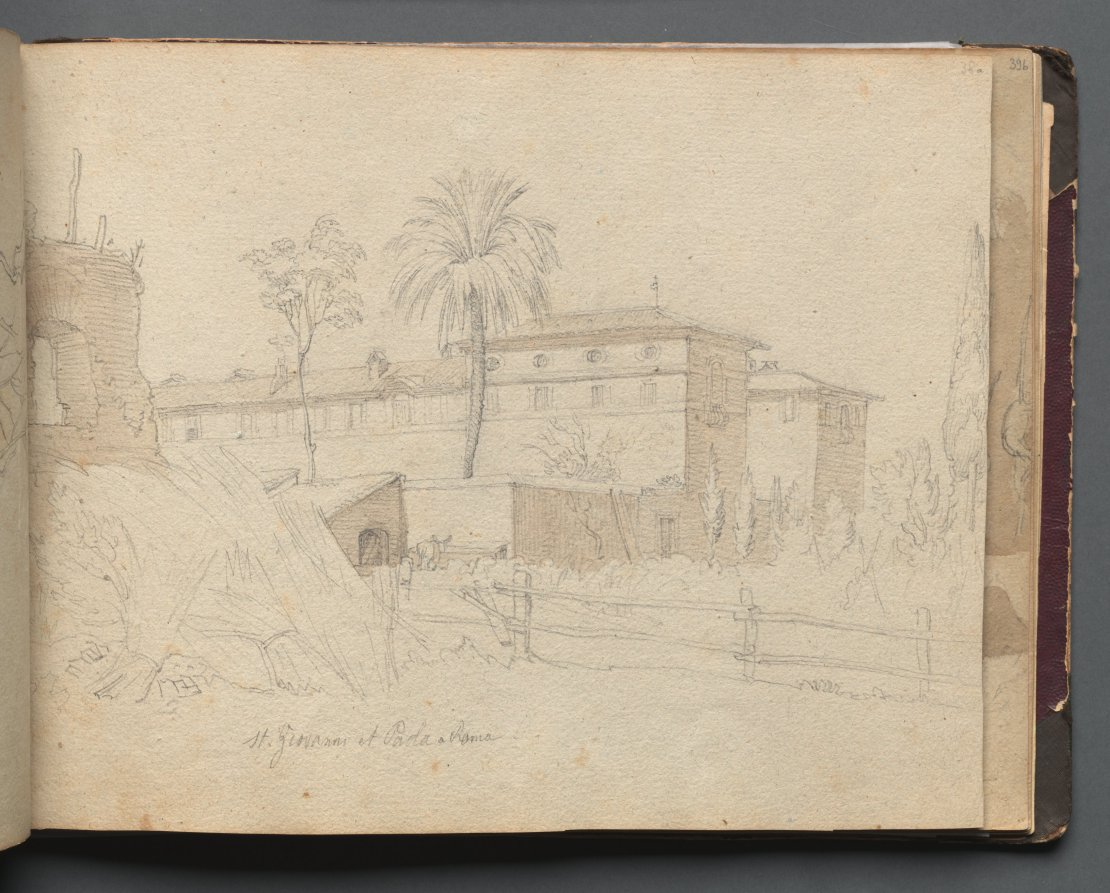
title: Album with Views of Rome and Surroundings, Landscape Studies, page 38a: :St. Giovanni e Paolo, Rome"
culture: Germany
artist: Franz Johann Heinrich Nadorp (German, 1794–1876)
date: c. 1830s-70s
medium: graphite with brown wash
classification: Bound Volume